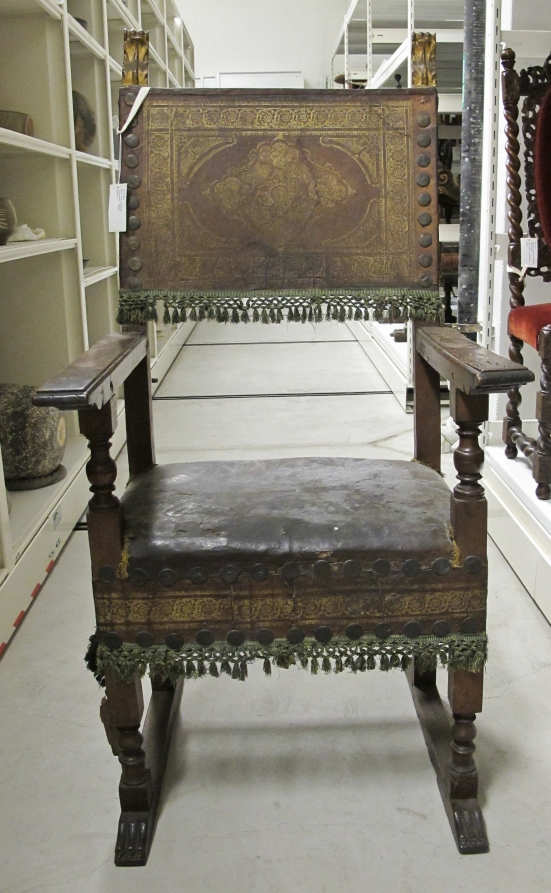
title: Armchair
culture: Italy, 17th century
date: 1600s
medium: walnut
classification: Furniture and woodwork